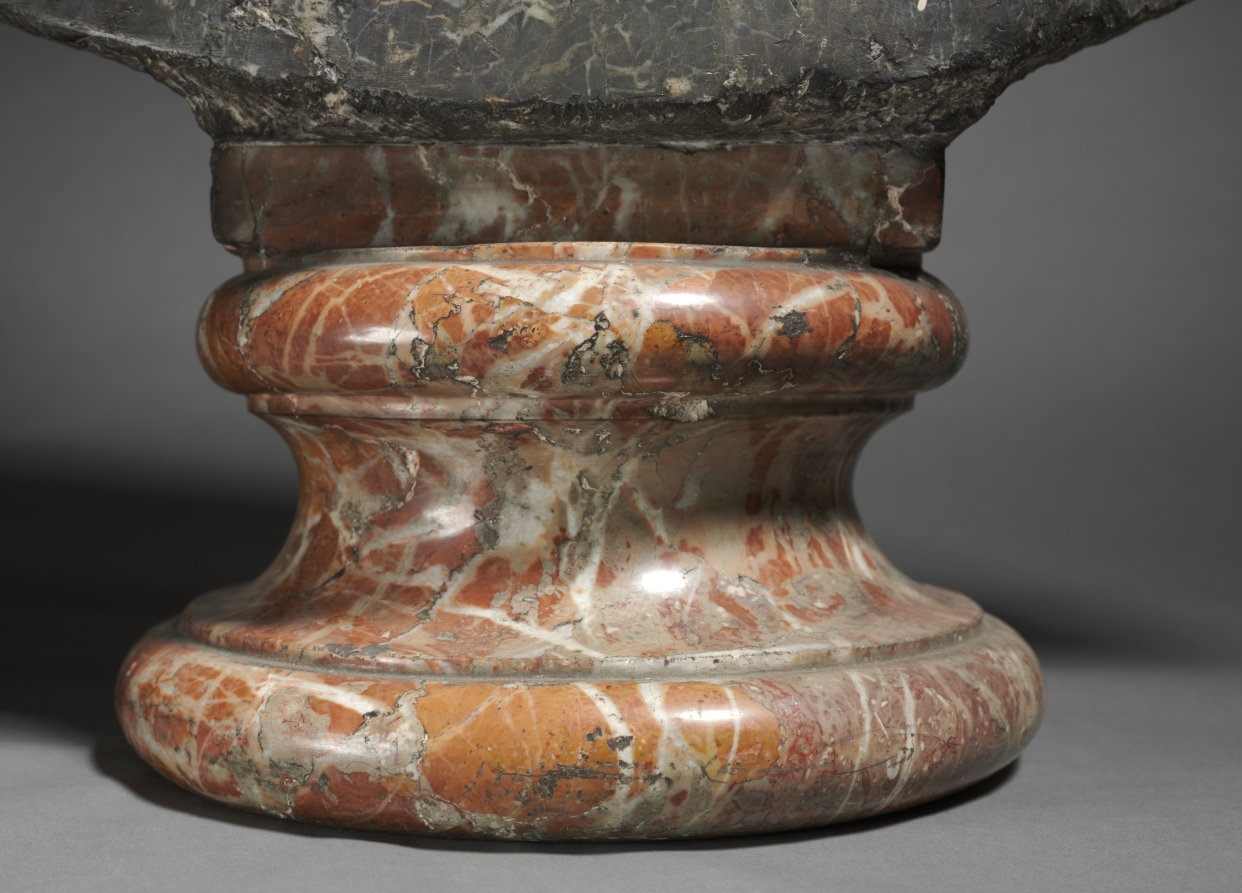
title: Bust of the Ludovisi Cicero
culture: Italy, 17th century or later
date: 1600s or later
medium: marble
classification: Sculpture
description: This work is a variant on the so-called Ludovisi Cicero, a bust in the Uffizi, Florence, that was long-believed to represent the famous Roman orator, but in fact appears to represent an unknown intellectual from the late Roman Republic or early Empire. This interpretation may date as late as the 20th century, and may have been assembled from separate parts.